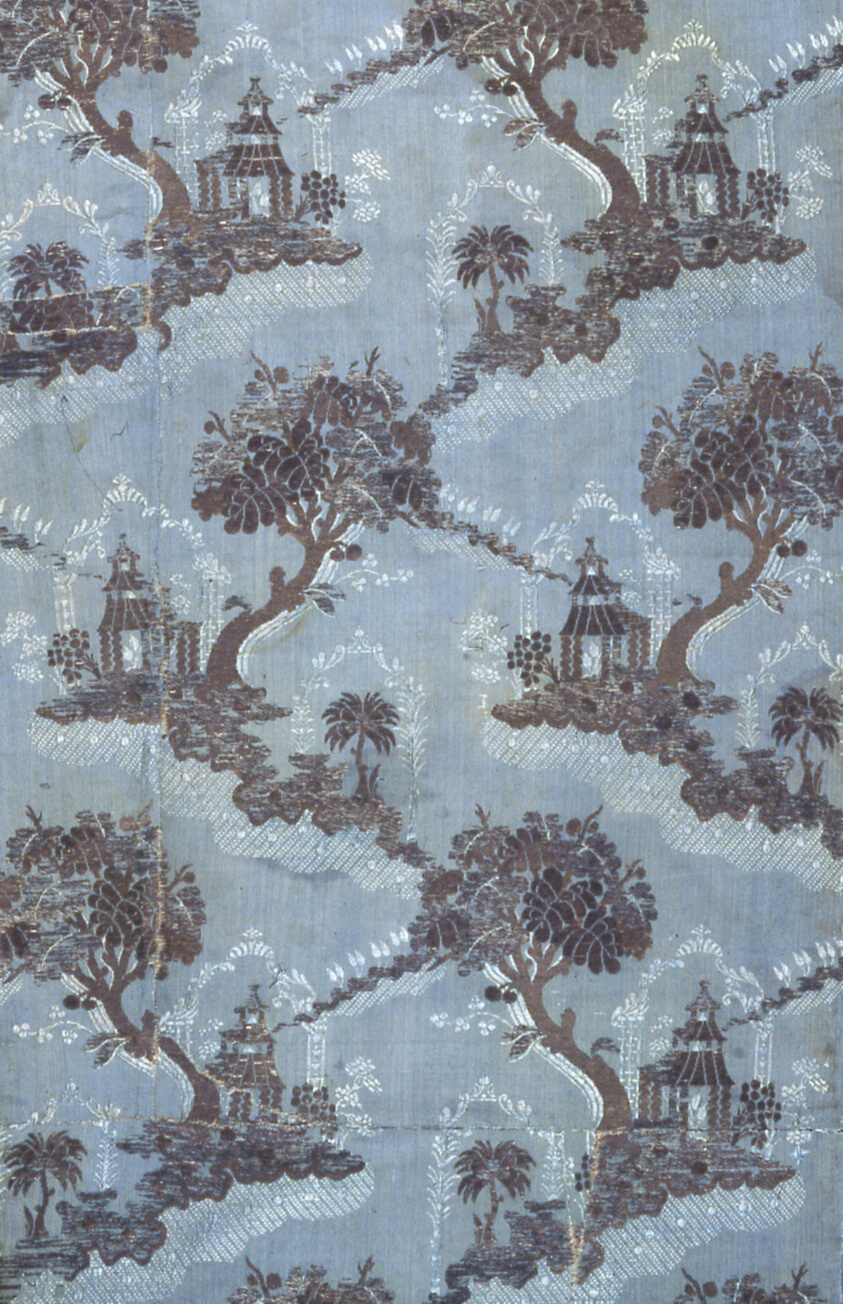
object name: Textile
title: Panel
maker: France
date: c. 1734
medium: Silk, gilt-metal strip and gilt-metal-strip-wrapped silk, plain weave with patterning and brocading wefts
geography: France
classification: textile; weaving